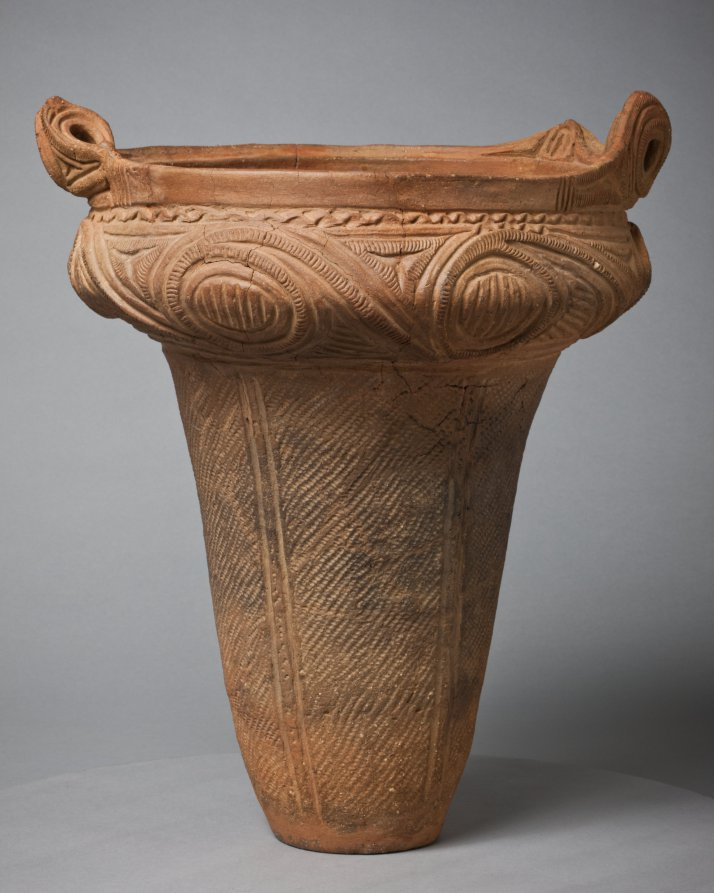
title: Urn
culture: Japan, Jōmon period (c. 10,500–300 BCE)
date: c. 2000 BCE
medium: earthenware, terracotta, impressed and incised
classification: Ceramic